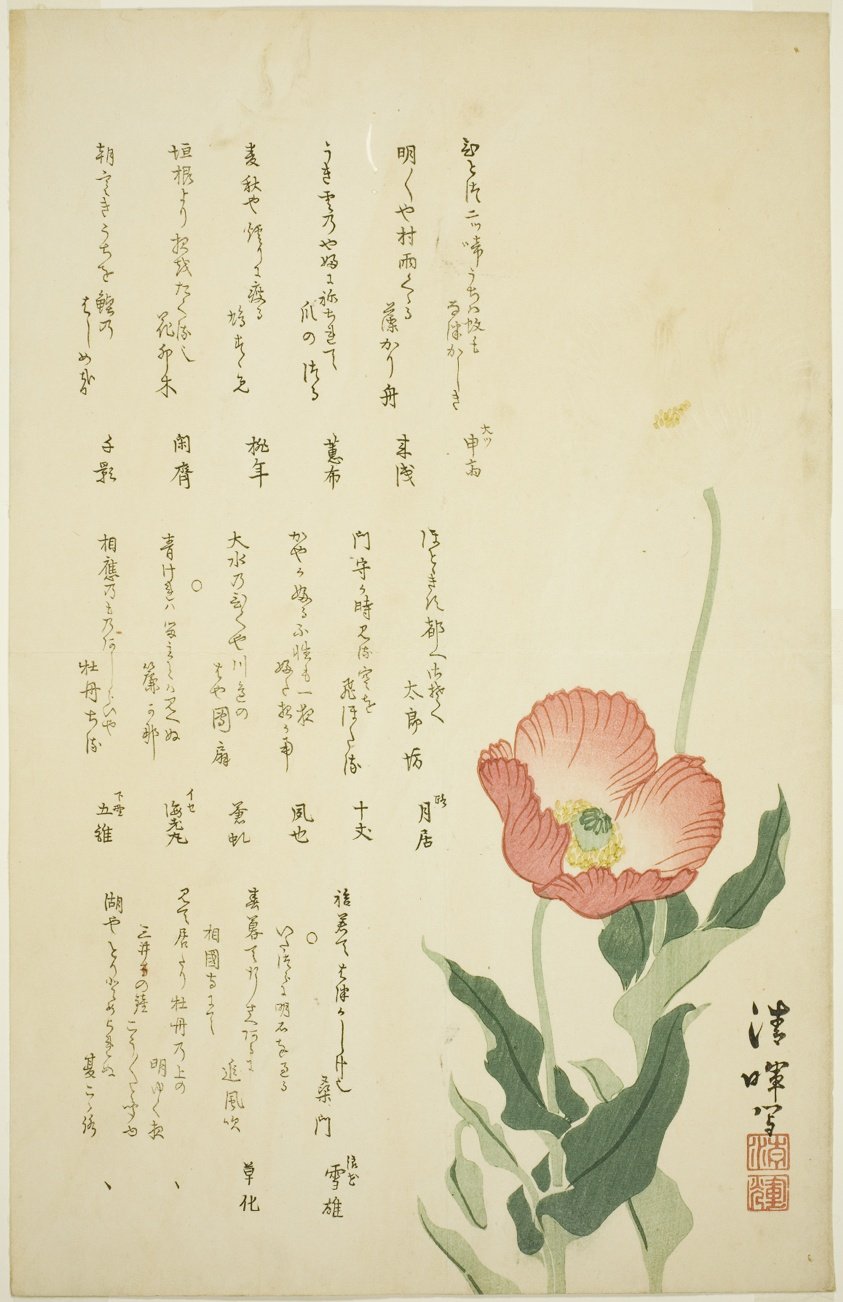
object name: Print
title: Two Poppies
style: Japanese (culture or style)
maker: Yokoyama Seiki (Japanese, 1793-1865)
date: c. early 1820s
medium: Color woodblock print; surimono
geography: Japan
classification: woodblock print; print; asian art